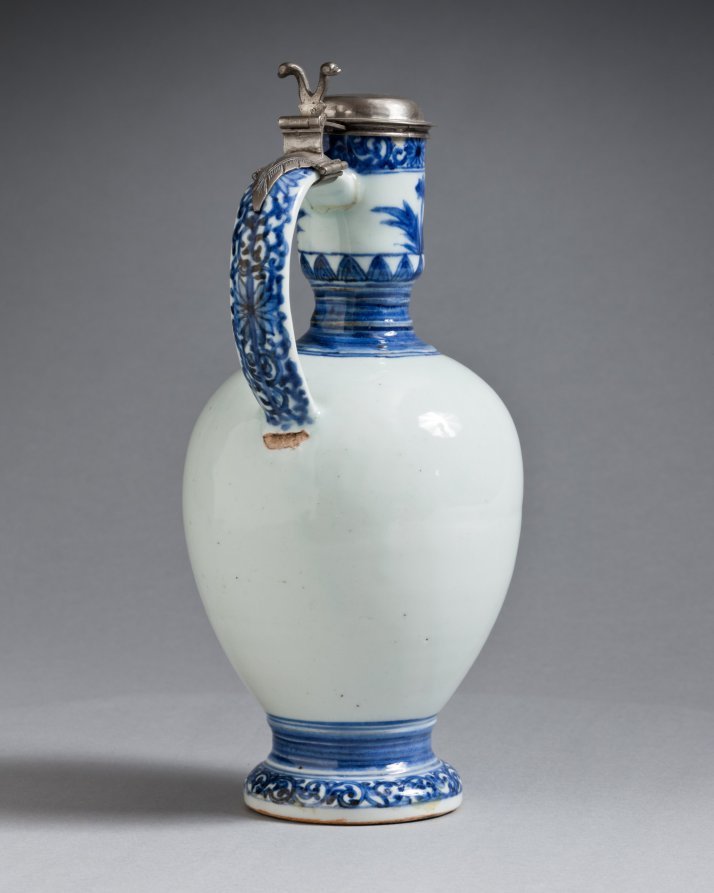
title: Jug with Silver Mounts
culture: Japan, Edo period (1615–1868)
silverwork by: Barent van Leeuwen (Dutch, 1637–1682)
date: c. 1662–76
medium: porcelain with underglaze blue decoration and silver mounts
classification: Ceramic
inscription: [on silver]: town mark for Amsterdam; lion rampant crowned (alloy mark for 0-934 silver); d (date letter for 1666), maker's mark of Barent van Leeuwen.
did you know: The coat of arms on this jug are those of the Valckenier family, active in the Dutch East India Company.